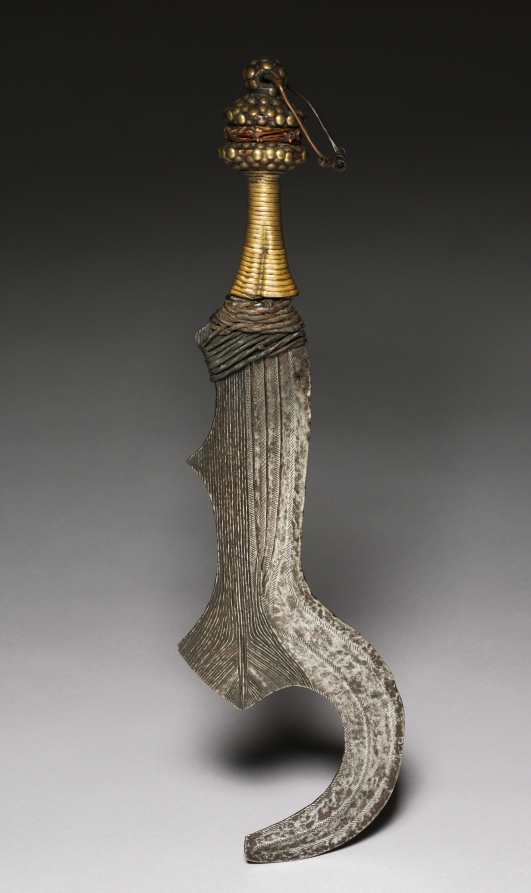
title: Knife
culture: Africa, Central Africa, Democratic Republic of Congo, Bangala-style maker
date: c. 1900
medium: Iron, wood, copper alloy, upholstery studs, plant fibers, and rawhide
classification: Arms and Armor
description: This beautifully wrought knife served as a symbol of political authority among the Ngala. Quite literally it signified the power of life and death for its form was derived from that of an executioner's knife.